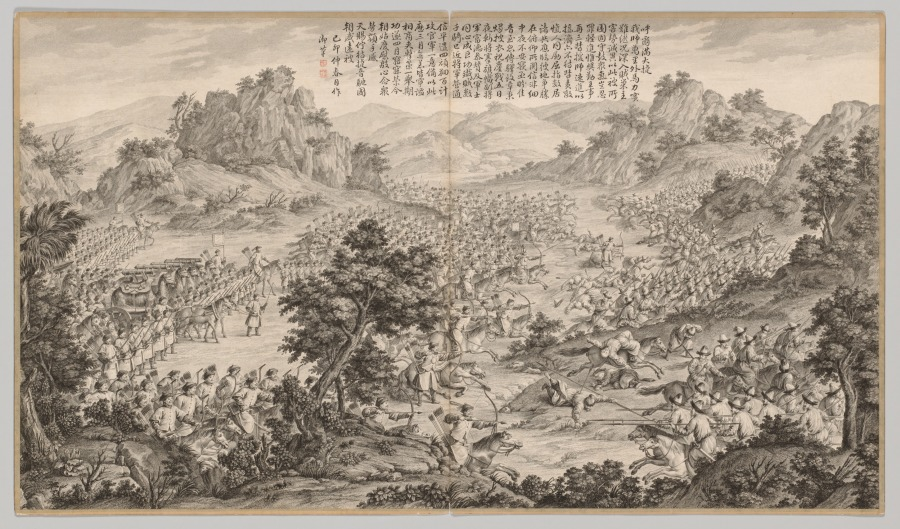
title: Great Victory at Hu'erman: from Battle Scenes of the Quelling of Rebellions in the Western Regions, with Imperial Poems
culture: China, Qing dynasty (1644–1911), Qianlong reign (1736–95)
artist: Jean Damascene Sallusti (Italian, d. 1781)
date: c. 1765–74; poem dated 1759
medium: etching, mounted in album form, 16 leaves plus two additional leaves of inscriptions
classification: Print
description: This set of etchings was commissioned by Emperor Qianlong to record in pictorial terms the courage of his generals and soldiers in quelling the rebellions in the Western Regions. Qianlong added his own poem to each of the etchings, indicating his appreciation and pride in this demonstration of military might. "Western Regions" refers to the present-day Xingjiang province, often described in Western writing as "Central Asia."